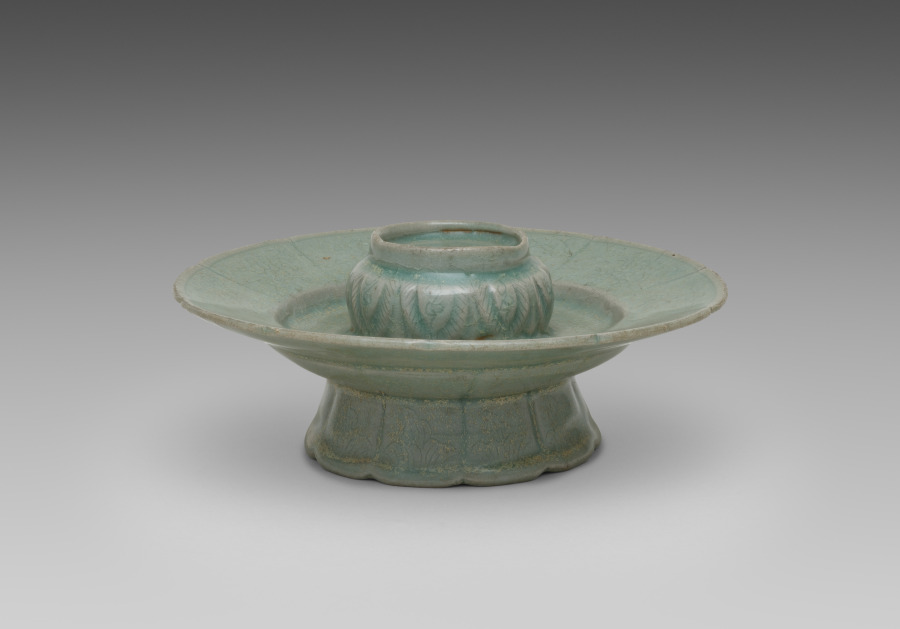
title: Floral-shaped Cup Stand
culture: Korea, Goryeo dynasty (918–1392)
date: 1200s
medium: pottery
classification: Ceramic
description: As early as the seventh century, the practice of drinking tea became an important part of elite culture in Korea. In enjoying teas, elites commissioned a variety of types of utensils and vessels including this delicate-looking cup stand, not only to make their tea-drinking experience more exciting, but also to show their refined taste.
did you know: Elites of the Goryeo period are known for their love of drinking tea and wine. This type of delicate-looking cup stands not only made their drinking experience more enjoyable, but also showed their refined taste.